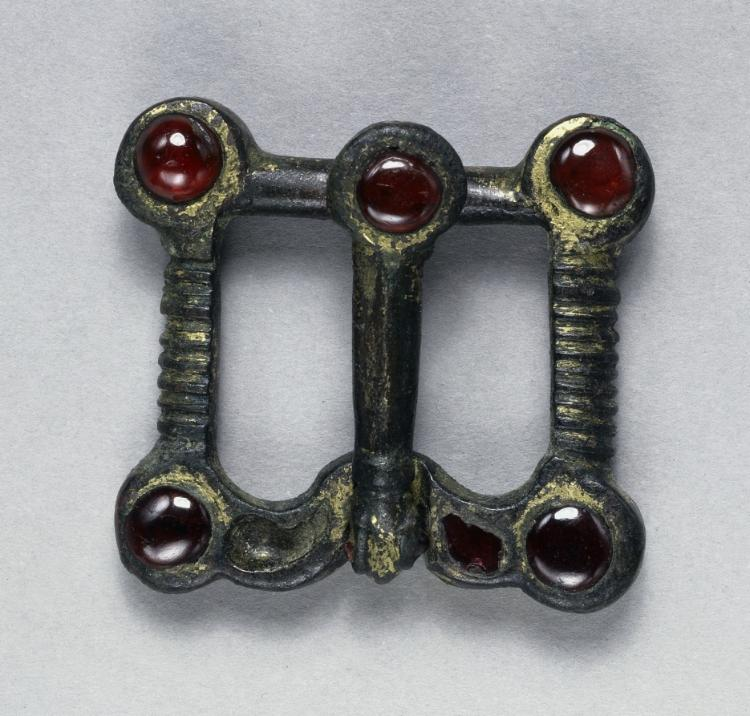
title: Buckle with Animal-Shaped Thorn and Belt Plate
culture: Sarmato-Gothic, Migration period, 5th century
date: 400s CE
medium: bronze with traces of gilding and garnets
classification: Jewelry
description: Between the AD 200s and the 600s, the European West is characterized by the so-called "barbarian invasions," a term referring to the movement of various Germanic people into the Roman Empire. The period of the great migrations of these Germanic peoples was one of uncertainty and disorder. By the AD 300s, the collapse of Roman military power in the western provinces was increased by the westward movement of the Huns, an especially fierce enemy from the east. The Huns drove before them displaced Germanic tribes—the Visigoths, Ostrogoths, and Lombards—as they advanced deep into the western provinces. These Germanic peoples were composed of many national groups with diverse customs and traditions. Long nomadic, they gradually settled and took to farming, though always preferring maritime commerce and fishing. They were not attracted to the monumental arts of architecture and sculpture until they had long settled an area. By contrast, the tombs of these migratory people were filled with weapons, tools, and jewelry, often magnificently decorated. The art of the Germanic peoples is almost exclusively one of personal adornment—a portable art that followed men and women to their graves.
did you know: During this time it was popular to wear gold inlaid with precious stones.